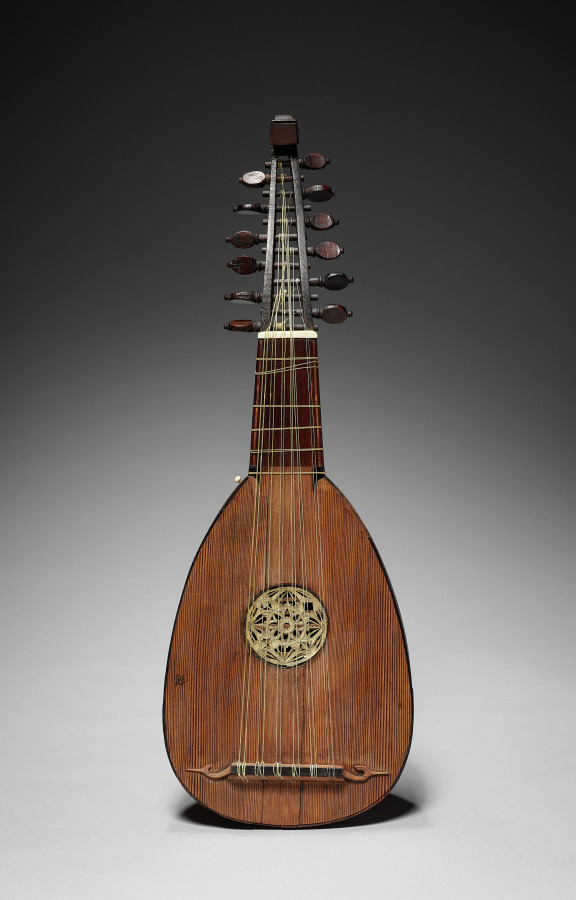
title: Lutina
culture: Italy, Milan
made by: Francesco Presbier (Italian)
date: 1736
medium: wood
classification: Musical Instrument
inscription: bears label: "Francesco Presbier in Milano nella/ contrada della Dogana fegno/ del Sole 1736."